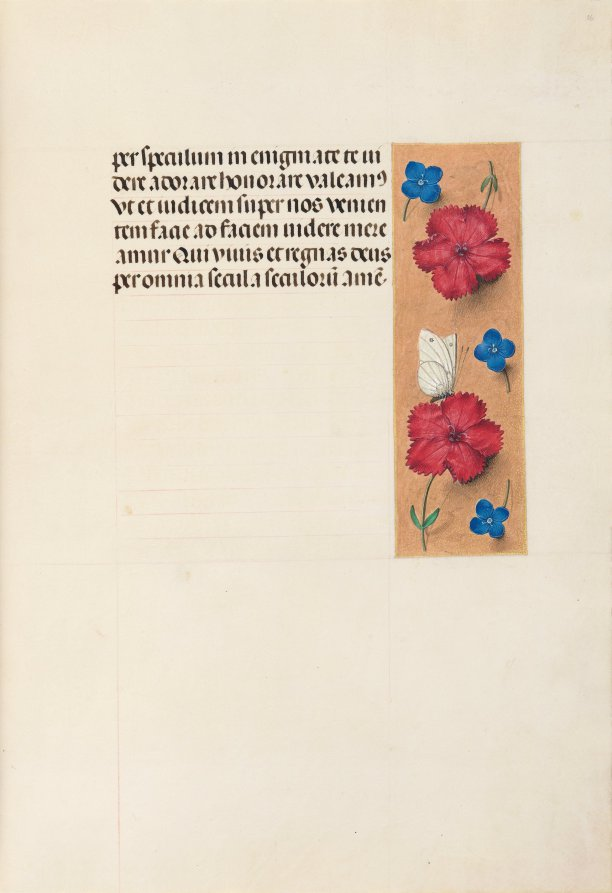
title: Hours of Queen Isabella the Catholic, Queen of Spain: Fol. 16r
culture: Flanders, Ghent and Bruges, late 15th century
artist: Master of the First Prayerbook of Maximillian (Flemish, c. 1444–1519)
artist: and Associates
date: c. 1500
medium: ink, tempera, and gold on vellum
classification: Bound Volume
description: This manuscript was illuminated by a circle of at least five highly organized manuscript painters active in the Flemish cities of Ghent and Bruges. The principal illuminator was Alexander Bening, who painted the majority of the book's miniatures. Manuscripts produced by this circle of artists are renowned for the decoration of their borders, which typically feature a rich variety of realistically-painted flowers, birds, and butterflies. This prayer book, called a book of hours, was intended not for a cleric, but for the private devotions of a lay person-in this case, Isabella the Catholic, Queen of Spain (1451-1504). Isabella's coat of arms embellishes the book's frontispiece. It is unlikely that the book was commissioned by the Queen herself; rather, she probably received it as a diplomatic gift from someone courting her patronage, perhaps Cardinal Francisco Jimenez de Cisneros. A Franciscan friar, Jimenez was dependent upon Isabella for his advancement, first to the post of Queen's confessor in 1492, and then to Archbishop of Toledo in 1495.